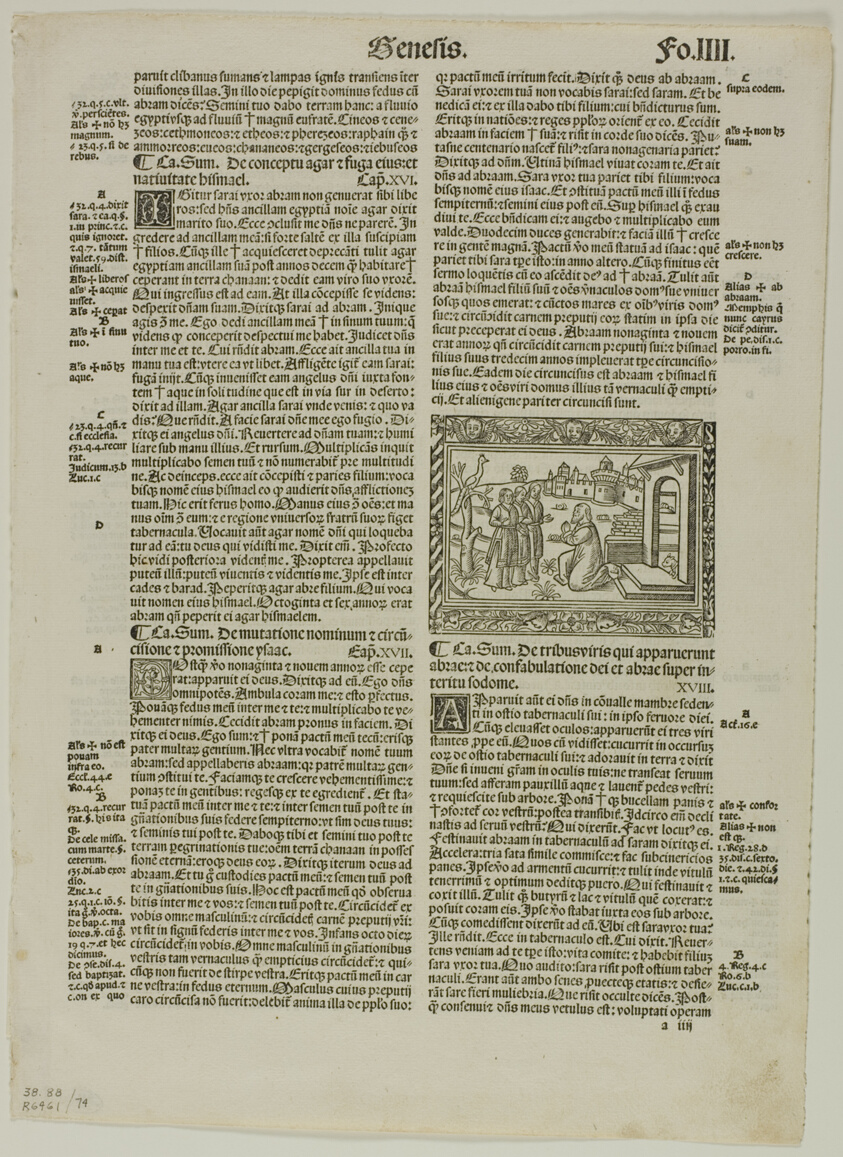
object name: Print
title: Illustration from Biblia cum concordantiis, plate 74 from Woodcuts from Books of the XVI Century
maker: Unknown Artist (French, 16th century); assembled by Max Geisberg (Swiss, 1875-1943)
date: 1514, assembled into portfolio 1937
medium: Woodcut on paper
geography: France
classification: woodcut; print; prints and drawing